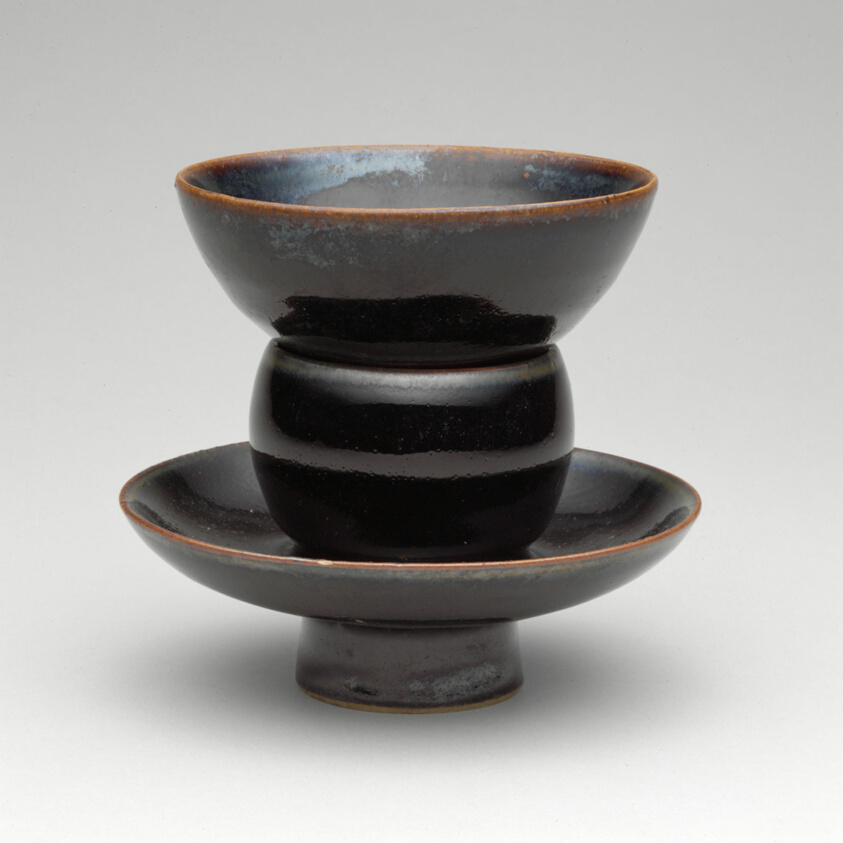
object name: Vessel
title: Cup and Cupstand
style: Chinese (culture or style)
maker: China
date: Northern Song dynasty (960–1127), 11th century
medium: Northern black ware, Cizhou type; light-gray stoneware with dark-brown glaze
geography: China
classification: drinking vessel; stoneware; vessel